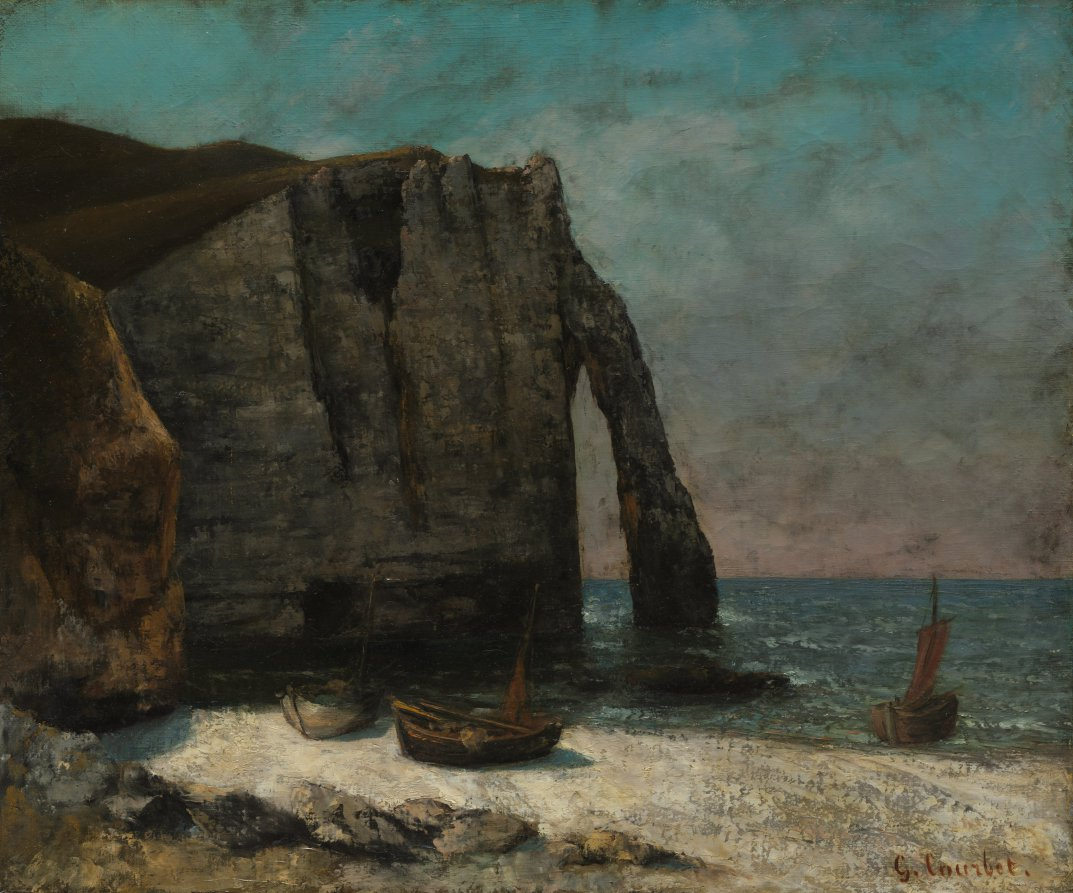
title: The Cliff at Étretat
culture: France, 19th century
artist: imitator of Gustave Courbet (French, 1819–1877)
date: after 1872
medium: oil on fabric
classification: Painting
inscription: Signed lower right: G. Courbet